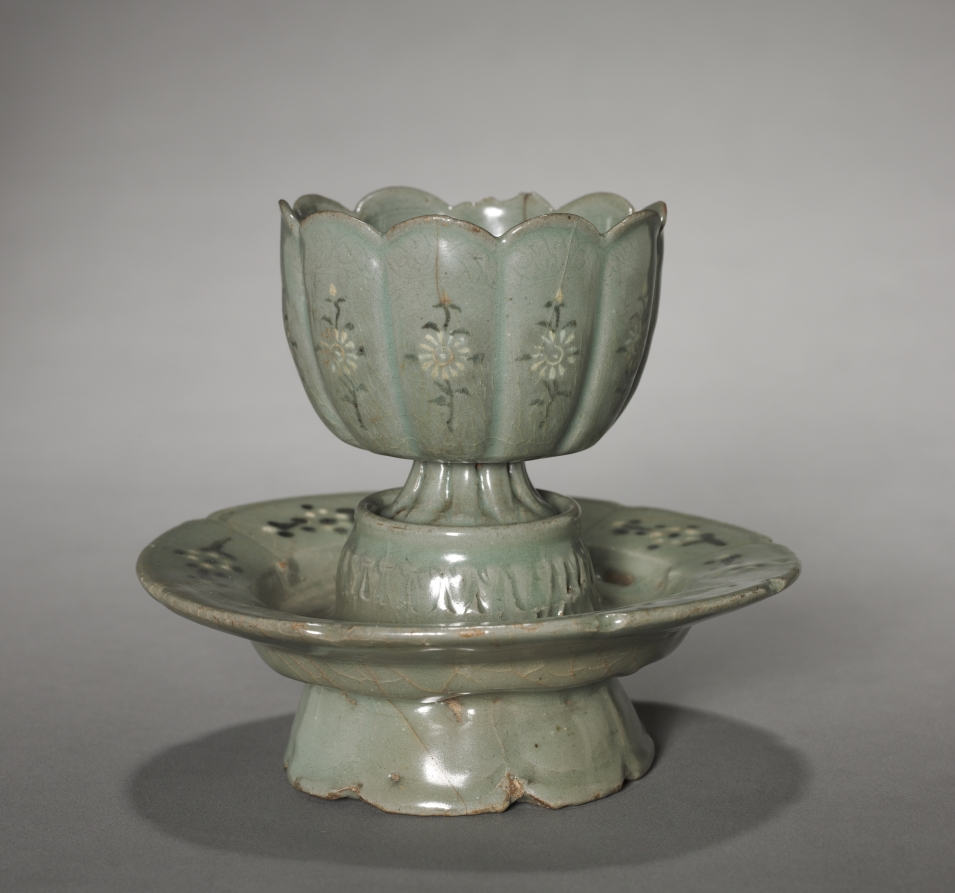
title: Floral-shaped Cup and Saucer with Inlaid Chrysanthemum Design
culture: Korea, Goryeo dynasty (918–1392)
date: 1100s-1200s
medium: Celadon ware with inlaid white and black slip decoration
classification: Ceramic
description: In Korea, chrysanthemum flowers and leaves were made into both tea and wine. Chrysanthemum wine was enjoyed during the the Double Nine Festival (the ninth day of the ninth month in the lunar calendar) praying for longevity. The flower design on the saucer is less delicate than the cup, suggesting that the cup and saucer originally were not related to each other.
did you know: Elites of the Goryeo period are known for their love of drinking tea and wine. In Korea, chrysanthemum flowers and leaves were made into both tea and wine.